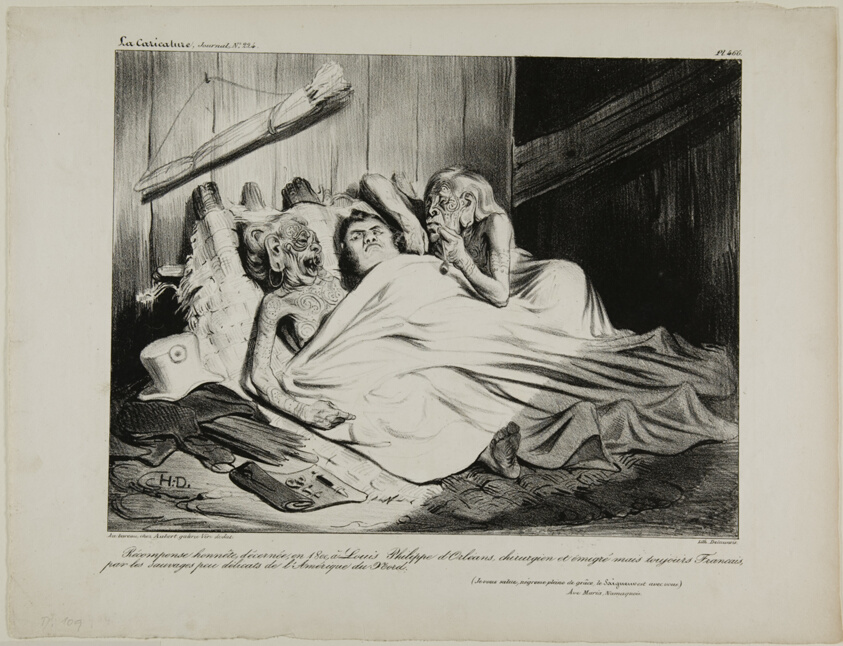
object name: Print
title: A Fair Reward Presented in 1800 by the Un-Prudish Savages of North America to Louis-Philippe of Orléans, surgeon and expatriate, but still a Frenchman. (I salute you, gracious Black Lady, the Lord is with you.) A Namaquan Ave Maria, plate 466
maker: Honoré Victorin Daumier; French, 1808-1879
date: 1835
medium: Lithograph in black on ivory wove paper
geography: France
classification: lithograph; print; prints and drawing